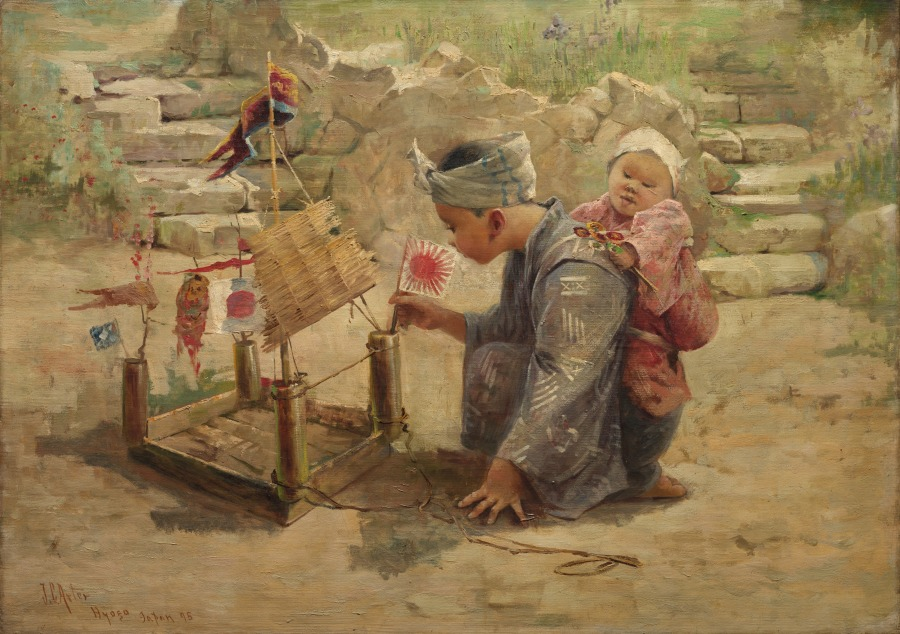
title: Japanese Boy Building a Man-of-War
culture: America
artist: J. C. Arter (American, 1859–1923)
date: 1895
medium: oil on canvas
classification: Painting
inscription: signed lower left: J. C. Arter / Hyozo / Japan 95